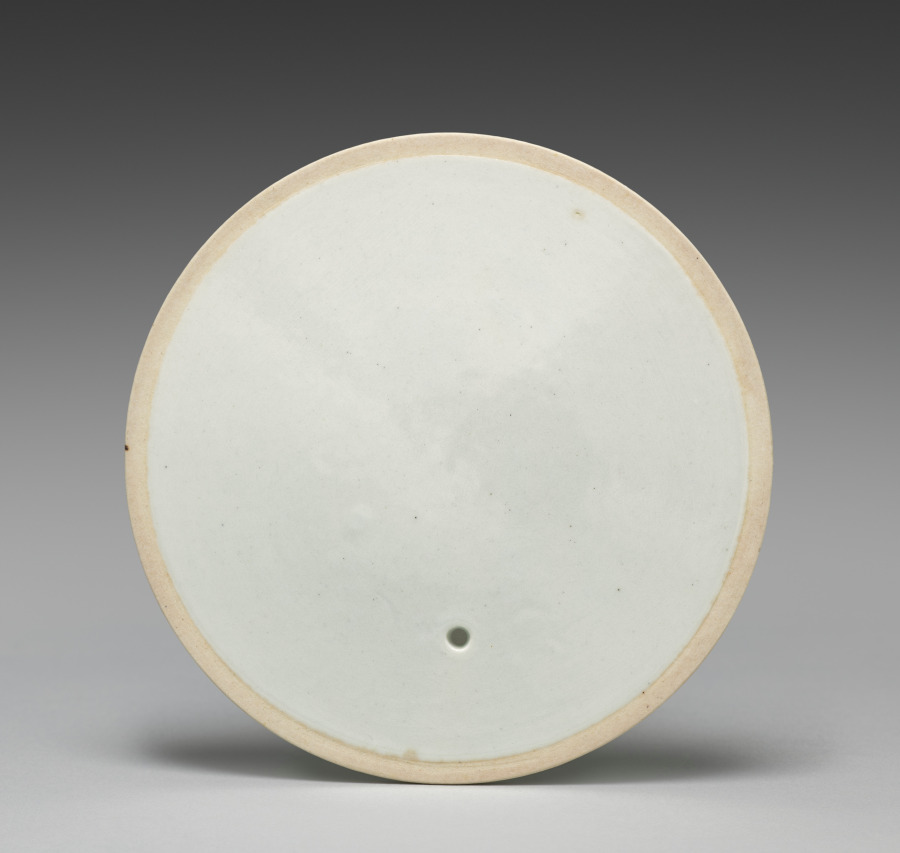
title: Lid for a Sake Pourer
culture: Japan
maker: Seifū Yohei III (Japanese, 1851–1914)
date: c. 1887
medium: Porcelain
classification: Ceramic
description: This sake pourer has a wide basin with a low foot; a generous spout open across the top half; a flat, round lid with a small knob recessed flush to the top of the container; and a tall, arched handle that meets the container where the top joins the basin at a sharp angle. This vessel is glazed but otherwise undecorated. Unlike the creamy white color of some Yohei III works, the white of this sake pourer has the bluish cast typical of porcelains produced in Kyoto.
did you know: Seifū Yohei III signed this sake pourer in underglaze blue on the base.